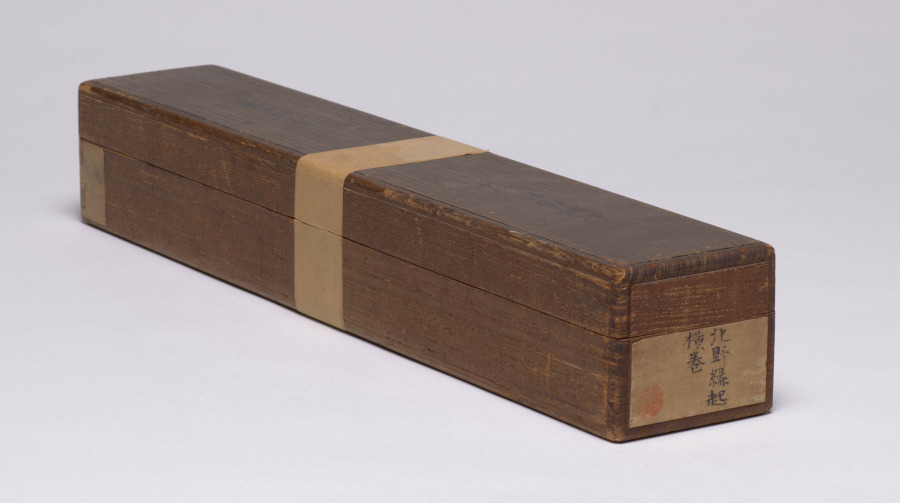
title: Stork, Sun, and Pine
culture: Japan, Edo period (1615–1868)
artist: Utagawa Hiroshige II (Japanese, 1826–1869)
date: c. 1839–1864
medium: color woodblock print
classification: Print